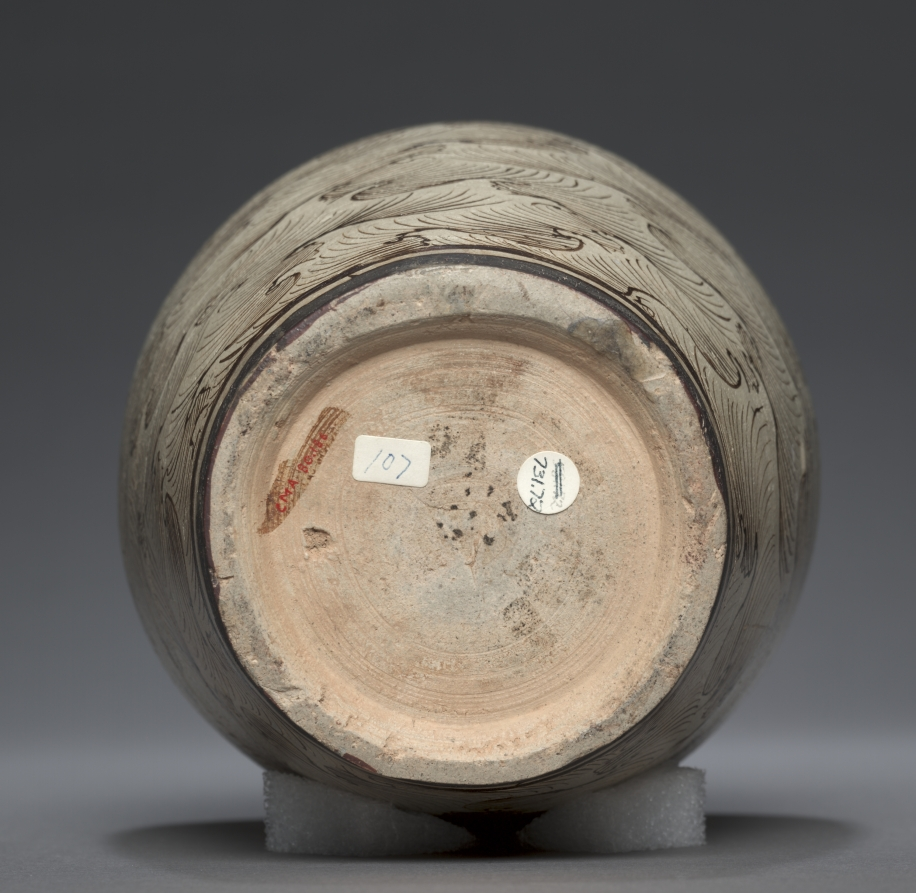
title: Vase (Meiping) with Waves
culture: China, Jiangxi Province, Yonghezhen, Yuan dynasty (1271–1368)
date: 1200s–1300s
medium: glazed stoneware with slip painted decoration, Jizhou ware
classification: Ceramic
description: Jizhou ware kilns in central Jiangxi province produced a dark ware in competition with other kilns in China and so Jizhou potters were highly inventive. Part of their work is a ware covered with a white slip over which they painted bold graphic designs of great visual effect. This striking wave design is remarkable in the way the painter transformed the entire surface of the vase into dynamically rolling masses of water, highlighted by cresting waves. Jizhou wares were excavated in cities of the lower Yangzi delta, including Nanjing, Shanghai, Changzhou, Taizhou, as well as Anhui province, Korea, and Japan.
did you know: When Jizhou ware is fired, the slip coating and the inlaid decoration assume a soft ivory color while the exposed clay body displays a warm cinnamon brown.